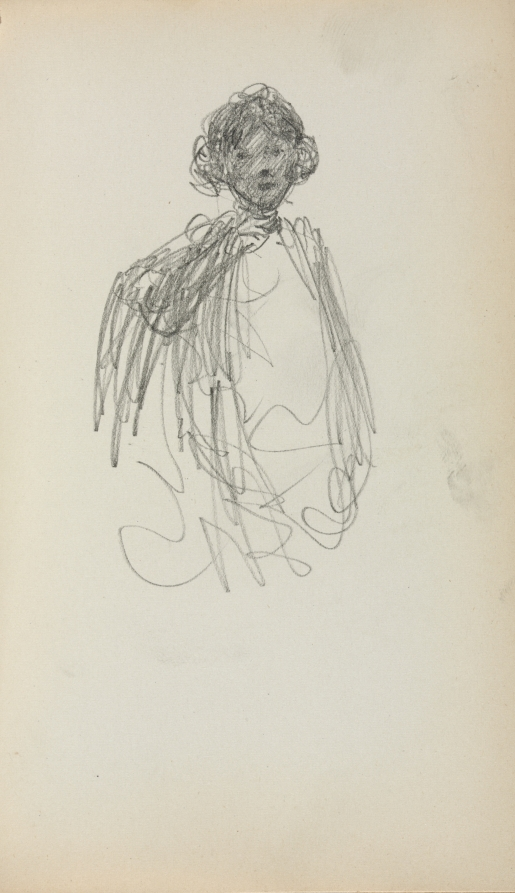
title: Italian Sketchbook: Woman, waist length (page 217)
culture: America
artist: Maurice Prendergast (American, born Newfoundland [now Canada], 1858–1924)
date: 1898–1899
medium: pencil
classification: Bound Volume